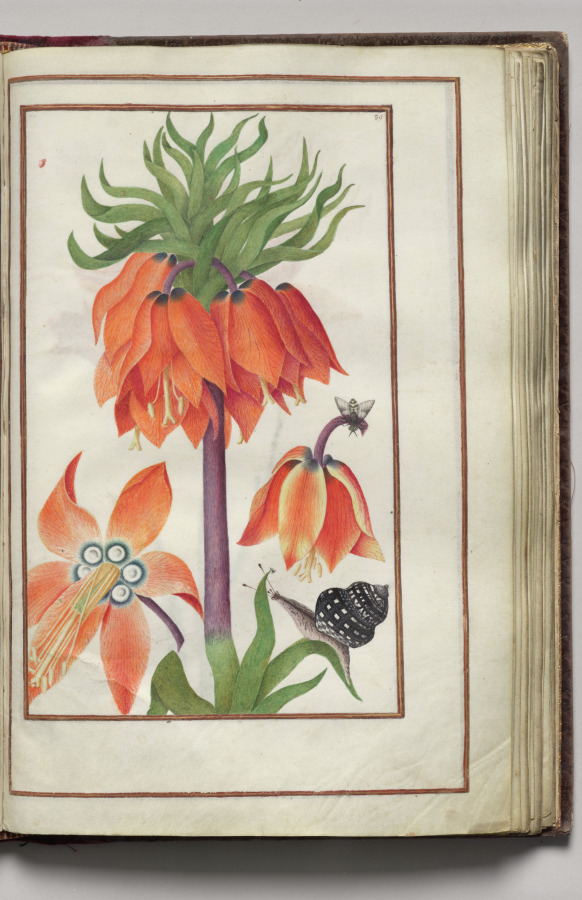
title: Orange Fritillaria Imperialis (Crown Imperial), Snail, and Bug, folio 20 (recto), from Florilegium (A Book of Flower Studies)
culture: France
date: 1608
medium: watercolor, ink, silver, and gold over occasional traces of pencil, on vellum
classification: Bound Volume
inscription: Dated: Poitiers 1608 (on frontispiece) Signed: On frontispiece in black ink, lower right: Van Kuyk Notation on drawing: Frontispiece: in pencil, lower margin: * élève de Van Kessel, peintre flammand (* in pencil also appears in front of Van Kuyk's name).